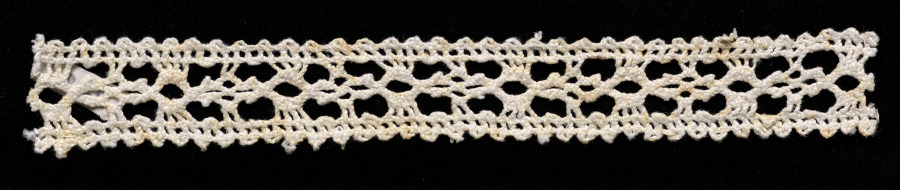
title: Lace Insertion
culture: Italy, Venice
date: 1540–60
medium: Bobbin lace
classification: Lace